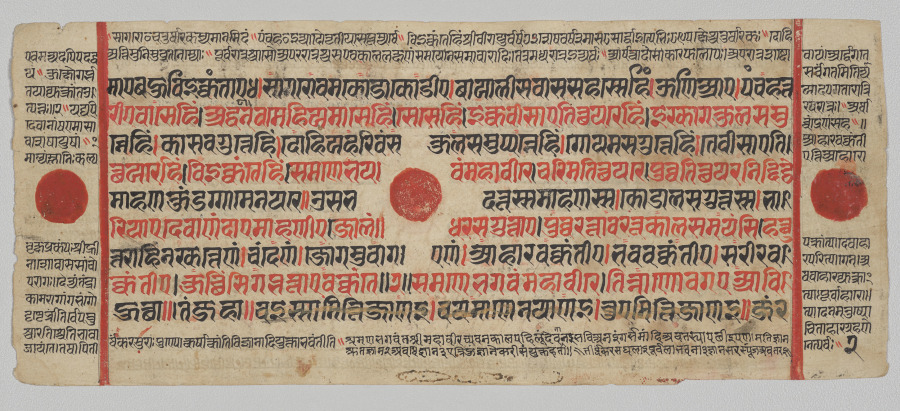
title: Text, Folio 2 (verso), from a Kalpa-sutra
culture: Western India, Gujarat, last quarter of the 15th century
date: c. 1475–1500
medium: Gum tempera, ink, and gold on paper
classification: Painting